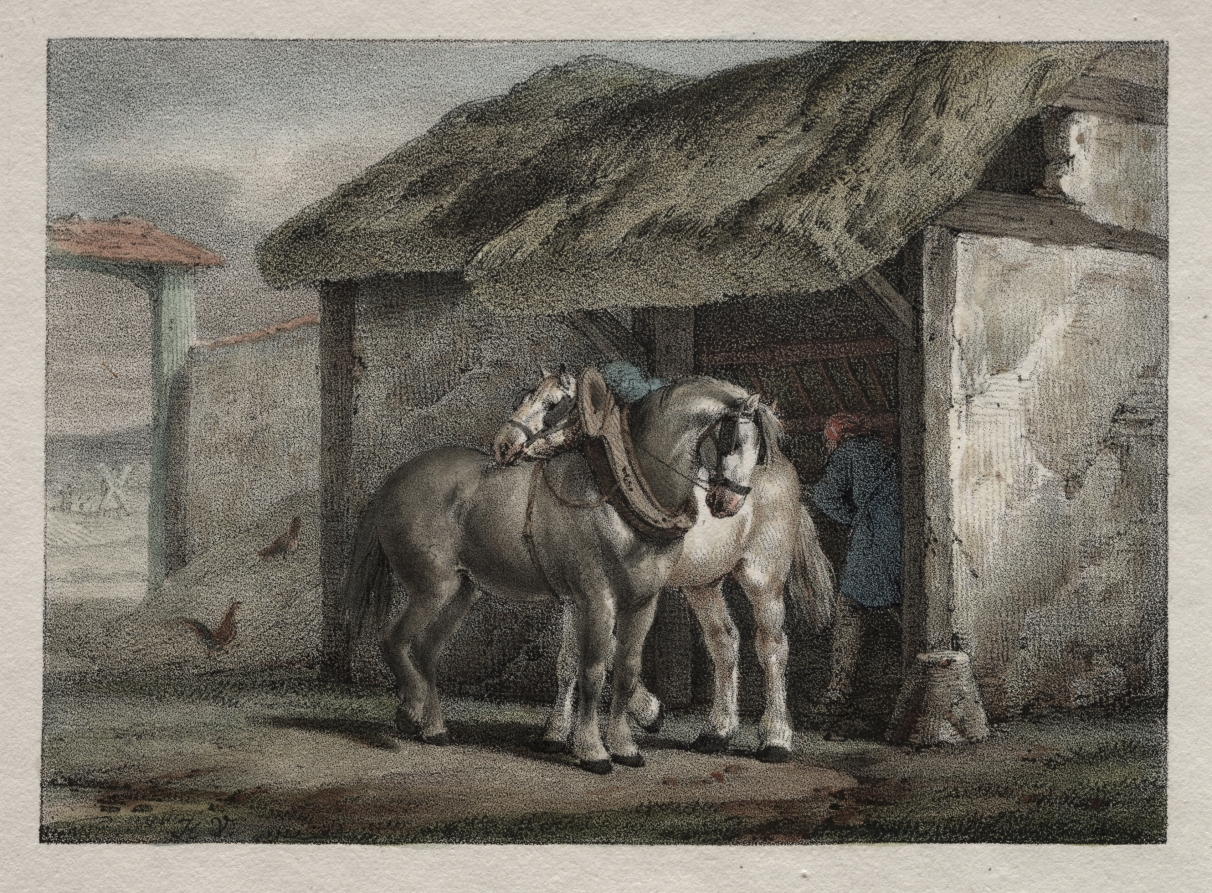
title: Farm Horse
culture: France, 19th century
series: Lithographic Sketches by Horace Vernet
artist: Horace Vernet (French, 1789-1863)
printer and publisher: Delpech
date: 1820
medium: lithograph with hand coloring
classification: Print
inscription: Written in graphite in margin, recto: "5 3/8 x 7 1/8 14 1/4 x 19 1/4"